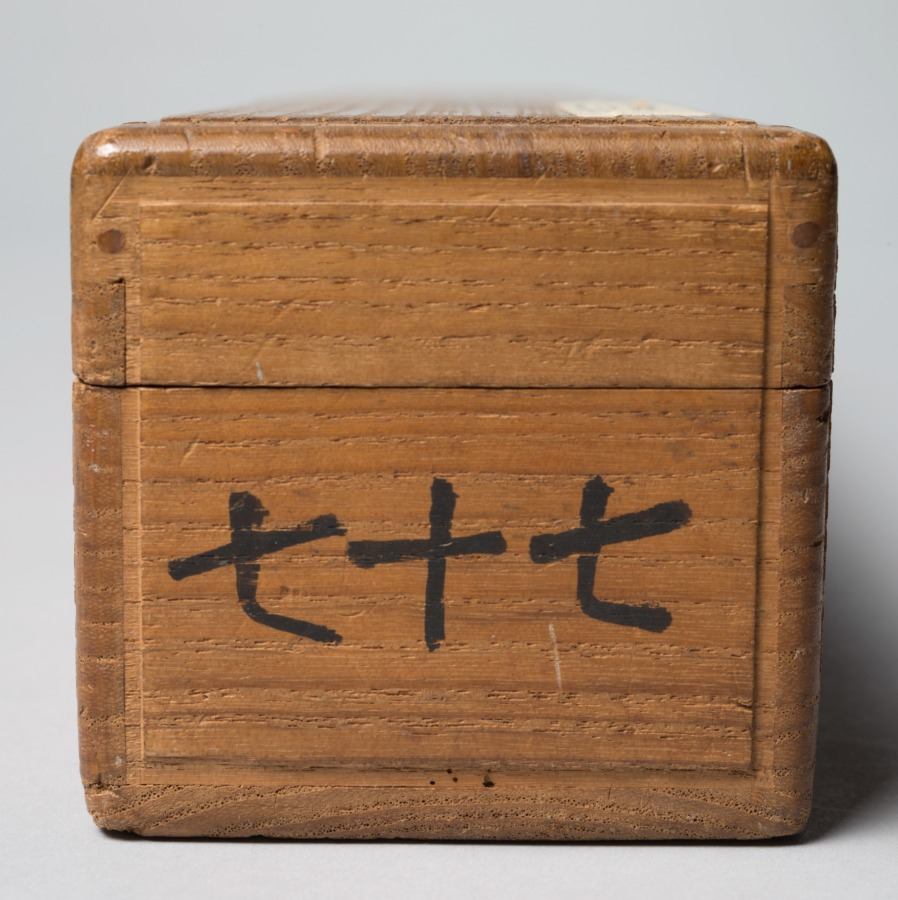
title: Turtle in a Lotus Pond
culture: Japan, Edo period (1615–1868)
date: 1700s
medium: hanging scroll; ink on paper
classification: Painting